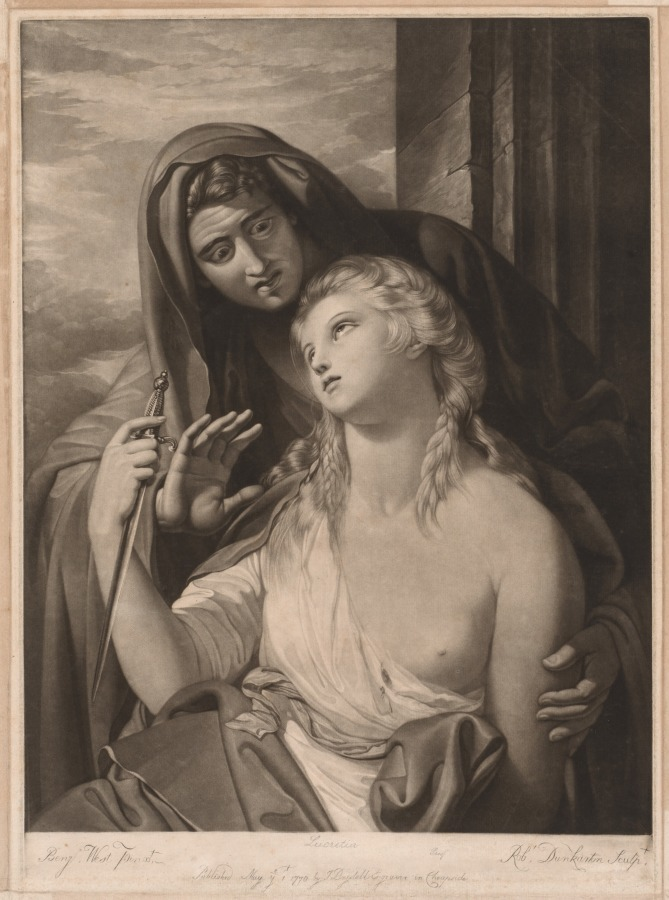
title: Death of Lucretia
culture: England, 18th century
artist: Robert Dunkarton (British, 1744-c. 1817)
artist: after Benjamin West (American, 1738–1820)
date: 1770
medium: mezzotint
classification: Print